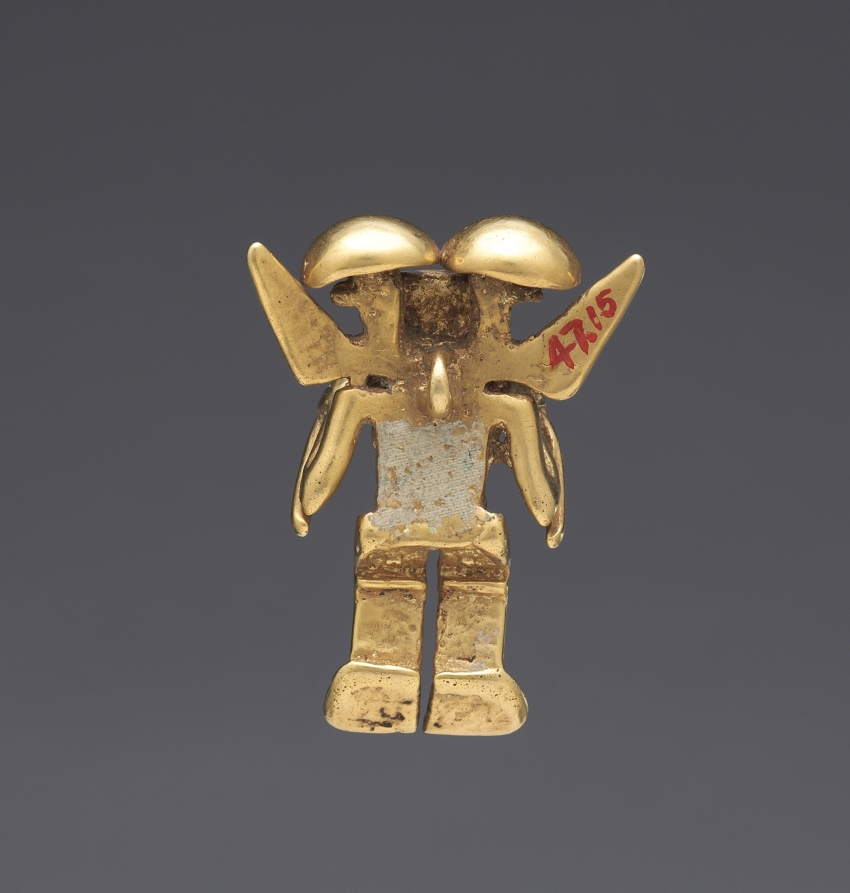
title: Animal-Headed Figure Pendant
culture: Colombia, Quimbaya or Yotoco style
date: 1–800 CE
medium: cast gold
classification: Metalwork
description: The same creature, with a human body but the head of an animal, appears in both pendants. It holds batons to its mouth, and whiskers or ears flare from the sides of the head. The headdress domes are mystifying; they have been described as mushrooms or gourds, among other things.